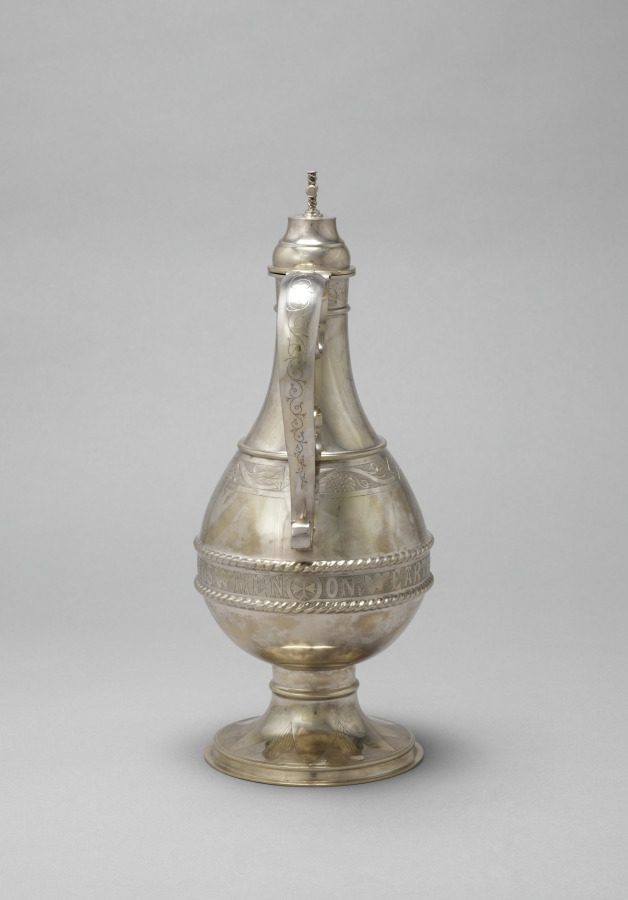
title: Flagon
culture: America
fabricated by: Francis W. Cooper (American)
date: c. 1853–1855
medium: silver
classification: Silver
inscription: engraved inscription around waist: "ON EARTH PEACE GOOD WILL TOWARDS MEN."